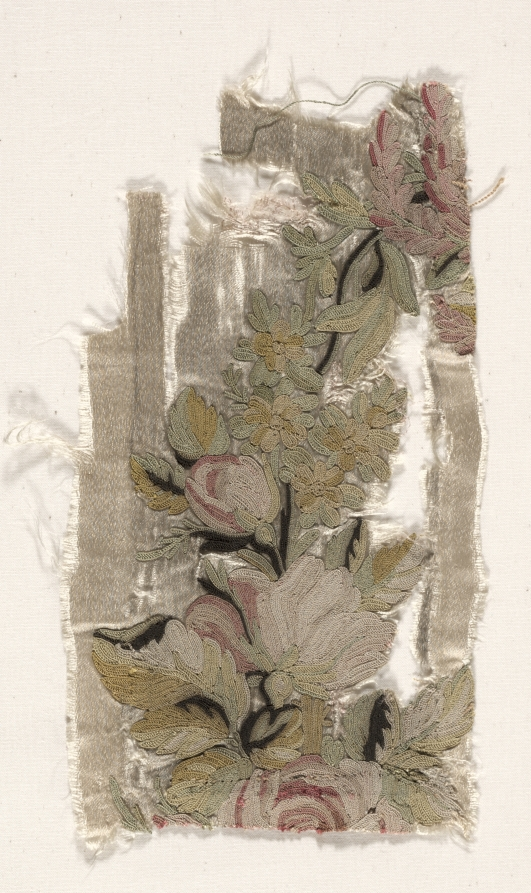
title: Coverlet Fragment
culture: France, 18th Century, period of Louis XVI (1774-1793)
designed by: Philippe de Lasalle (French, 1723–1805)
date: c. 1760–1770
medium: embroidered satin and silk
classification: Textile